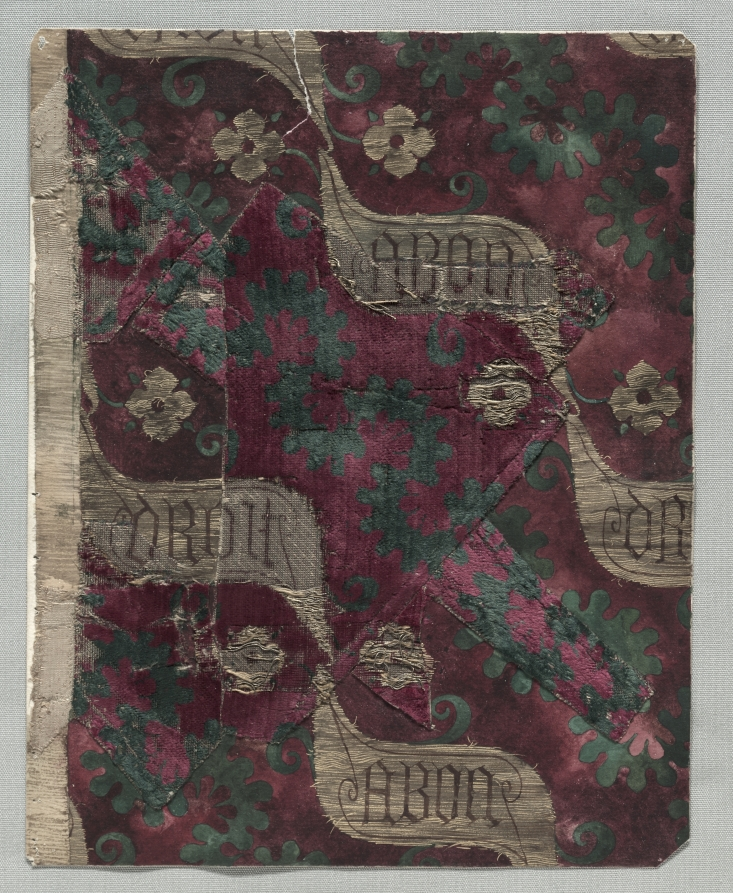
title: Velvet Fragment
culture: Italy, Milan ?, late 14th-early 15th Century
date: c. 1385–1402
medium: velvet (cut and brocaded); silk and metal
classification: Velvet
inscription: inscription on scrolls: "a bon droit." [NOTE: "a bon droit" is the French motto of Giangaleazzo Visconti, despot of Milan from 1385 to his death in 1402.]